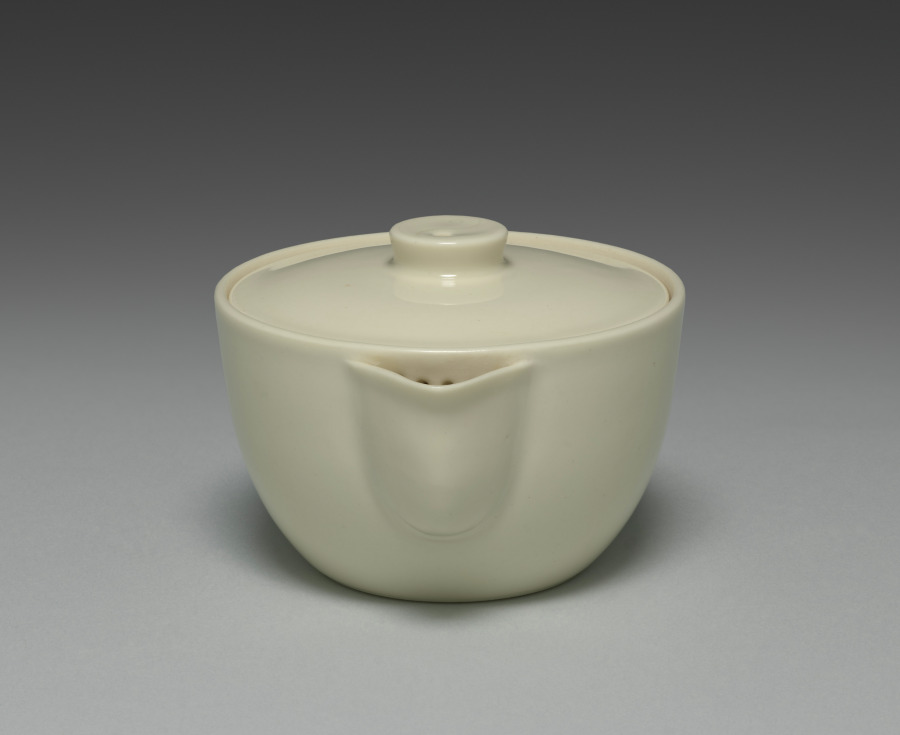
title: Hand-held Teapot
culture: Japan, Meiji period (1868–1912)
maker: Seifū Yohei III (Japanese, 1851–1914)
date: 1893–1914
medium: Porcelain with molded and carved design and cream glaze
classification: Ceramic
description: This teapot is of a variety used by advanced sencha practitioners. Called a hōhin, the pot is designed to be held directly by the fingers, with the body touching the upper part of the palm. This shape allows the host to manipulate the pot with a single hand and demonstrate dexterity. Direct contact between the ceramic body and the hand allows the host to closely gauge the temperature of the water within. There are differing grades of sencha, and for the finest one, gyokuro, the water temperature must be carefully regulated to achieve the proper flavor. This vessel is therefore efficacious for preparing this high-quality tea. The hōhin is also extremely portable, so it is well suited for impromptu gatherings. According to its box, this teapot is an example of taihakuji. “Great-white porcelain” was an important early invention Yohei III devised in 1972. It involved the combination of a distinctive translucent, creamy glaze over an ivory-colored clay body.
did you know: This pot’s restrained design includes on the lid’s handle a yin-yang motif, symbolizing the ideal balance between the forces of the universe.